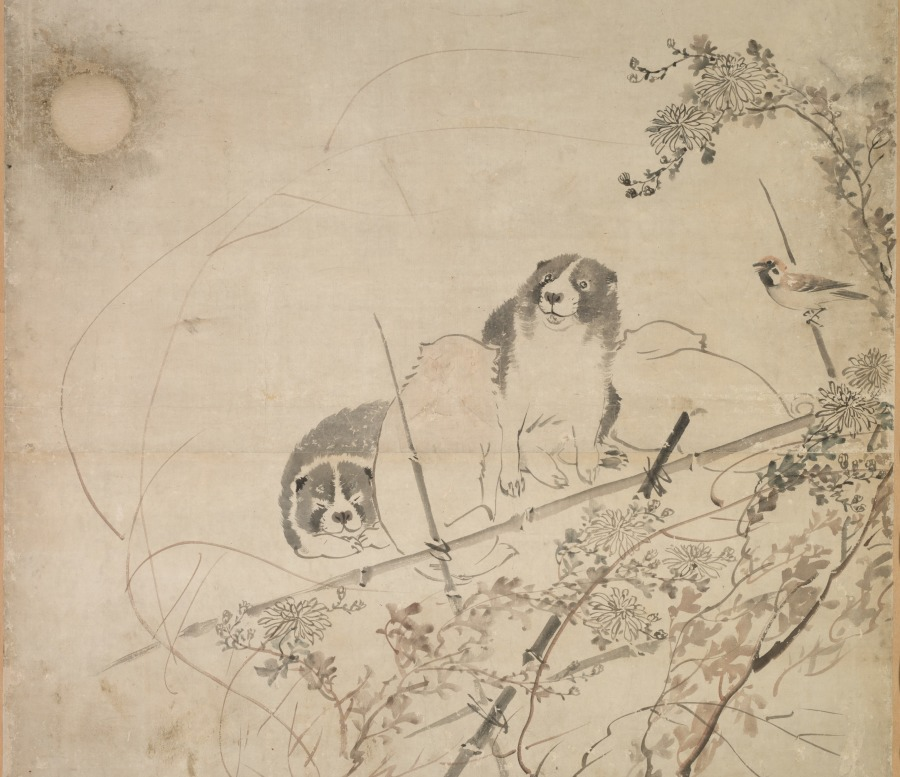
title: Puppies, Sparrows, and Chrysanthemums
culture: Japan, Edo period (1615–1868)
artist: Nagasawa Rosetsu (Japanese, 1754–1799)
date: c. 1792–94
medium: Fusuma panel remounted as a hanging scroll; ink and slight color on paper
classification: Painting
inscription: Signature and seal of artist upper left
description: These paintings were originally mounted as sliding doors (fusuma) used inside a building. The circular areas on the paintings’ paper surfaces are traces of the former positions of the door pulls (hikite). A flock of sparrows gathers on a trellis supporting flowering chrysanthemum. Below is a litter of puppies, some cavorting, others napping. The tender story created by the curious puppy peering up and tilting its head to listen to the bird’s insistent call in the leftmost part of the composition is characteristic of Nagasawa Rosetsu’s paintings, which often use animals to illustrate the human condition.